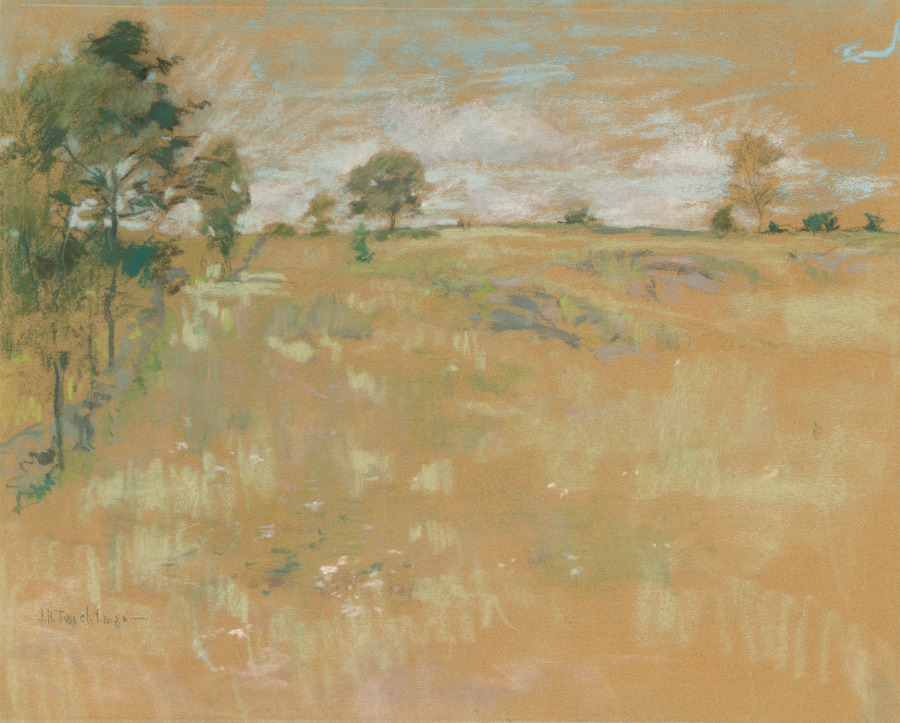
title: Pastures, Branchville, Connecticut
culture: America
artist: John Henry Twachtman (American, 1853–1902)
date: c. 1888–91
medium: pastel on composition board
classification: Drawing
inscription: signed, lower left, in crayon: J.H. Twachtman - ; along right edge, in graphite: 25 17 1/2 x 14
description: In the mid-1880s a group of American artists joined together to promote the expressive qualities of pastel. As a member of this group, known as the Society of Painters in Pastel, Twachtman contributed actively to their last three exhibitions in 1888, 1889, and 1890. As in this example, Twachtman incorporated the tone of his papers into his imagery, so that the paper becomes a part of the design itself. The most frequent subjects of his pastels were views of the fields and undulating countryside of Greenwich, Connecticut, with gentle rhythms punctuated by occasional trees and patches of wildflowers.